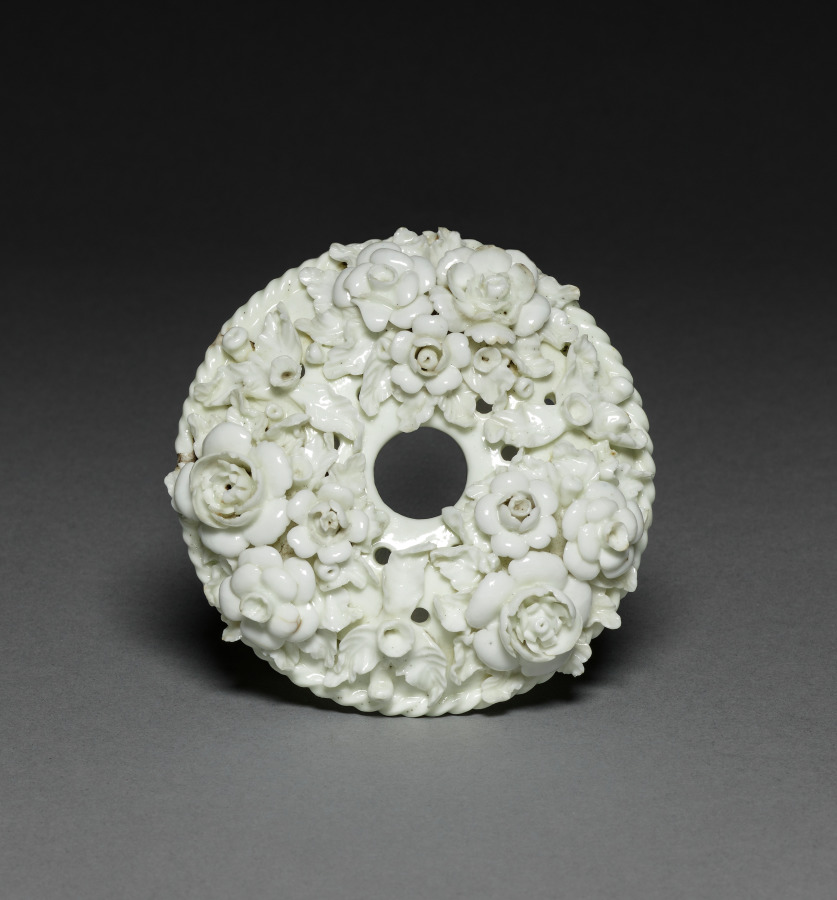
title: Cover for a Potpourri Vase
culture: France, Saint Cloud, 18th century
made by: Saint Cloud Porcelain Factory (French)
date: mid-1700s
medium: soft-paste porcelain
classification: Ceramic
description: This cover is part of a pair of covered vases that were created to contain potpourri, a mixture of flowers, herbs, and spices emitting ambient fragrance. This specific function offered a particularly fertile ground for the development of French porcelain, as manufactories experimented with forms, surface ornamentations, and placement of perforations.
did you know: Prior to Saint-Cloud's development of soft-paste porcelain in the 1690s, rumors spread throughout Europe that the prized material was made by burying a variety of materials, including lobster shells, in the ground for eighty years.